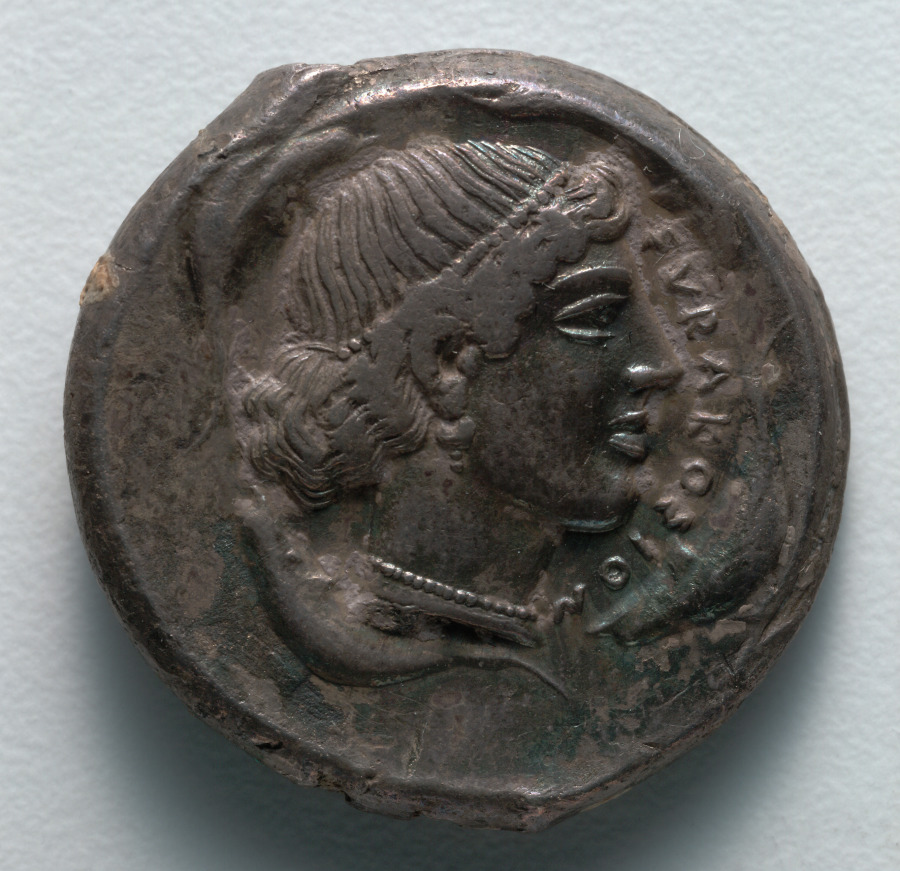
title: Tetradrachm: Head of Arethousa (reverse)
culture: Greek, minted at Syracuse (Sicily)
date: c. 467–440 BCE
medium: silver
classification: Coins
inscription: ΣΥΡΑΚΟΣΙΟΝ